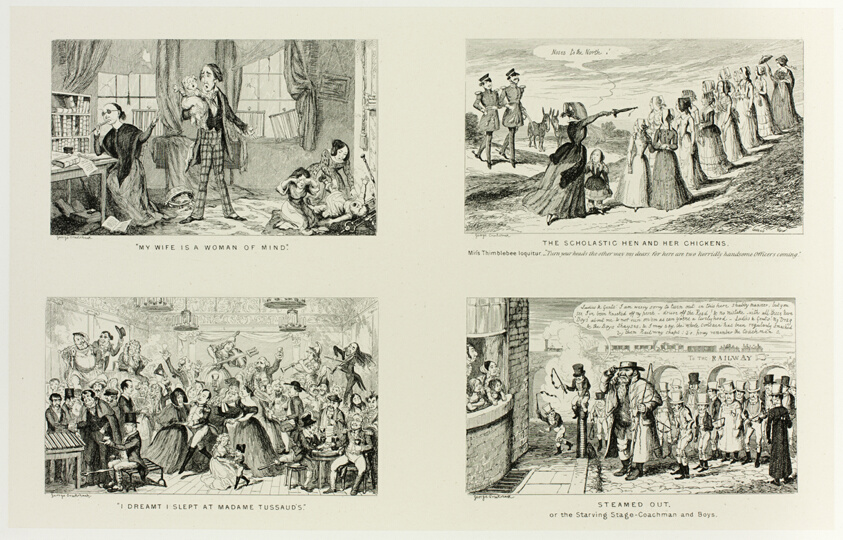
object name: Print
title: "My Wife is a Woman of Mind" from George Cruikshank's Steel Etchings to The Comic Almanacks: 1835-1853 (top left)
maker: George Cruikshank (English, 1792-1878); published by Pickering & Chatto (English, 19th century)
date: 1847, printed c. 1880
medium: Four steel etchings in black on cream India paper, laid down on off-white card (chine collé)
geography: England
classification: etching; paper; print; prints and drawing